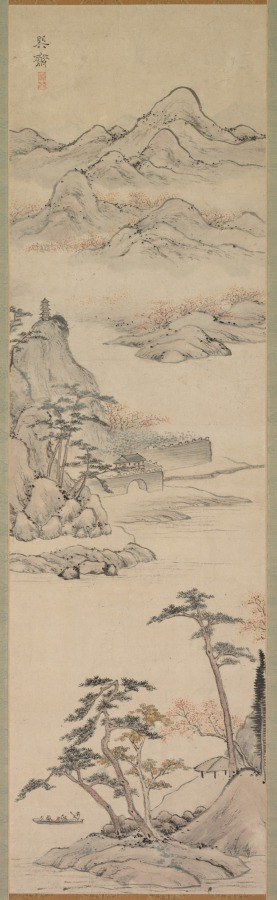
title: Landscape with Boaters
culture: Japan, Edo period (1615–1868)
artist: Kimura Kenkadō (Japanese, 1736–1802)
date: late 1700s–early 1800s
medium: hanging scroll; ink and slight color on paper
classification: Painting